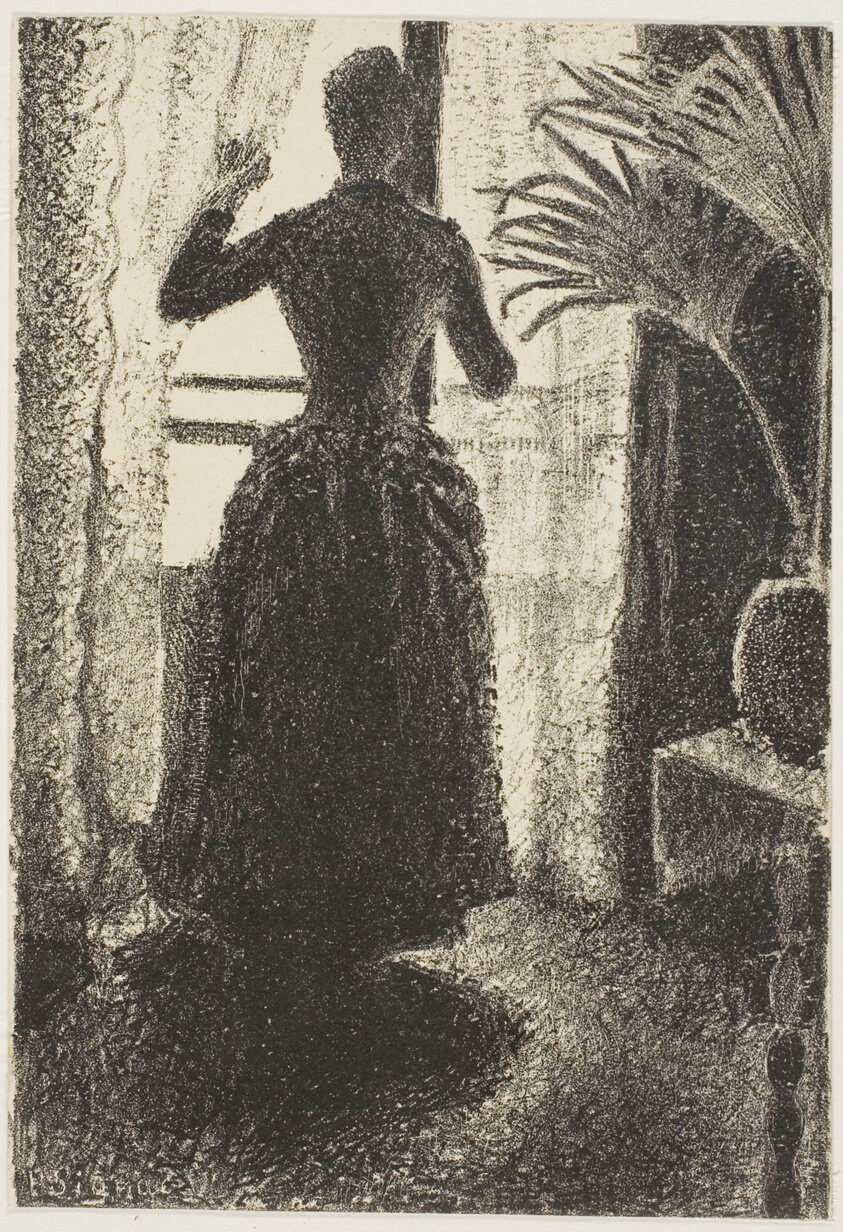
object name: Print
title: Sunday in Paris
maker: Paul Signac (French, 1863-1935)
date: 1887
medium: Lithograph in black, with scraping on stone, on cream wove paper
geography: France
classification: lithograph; print; prints and drawing